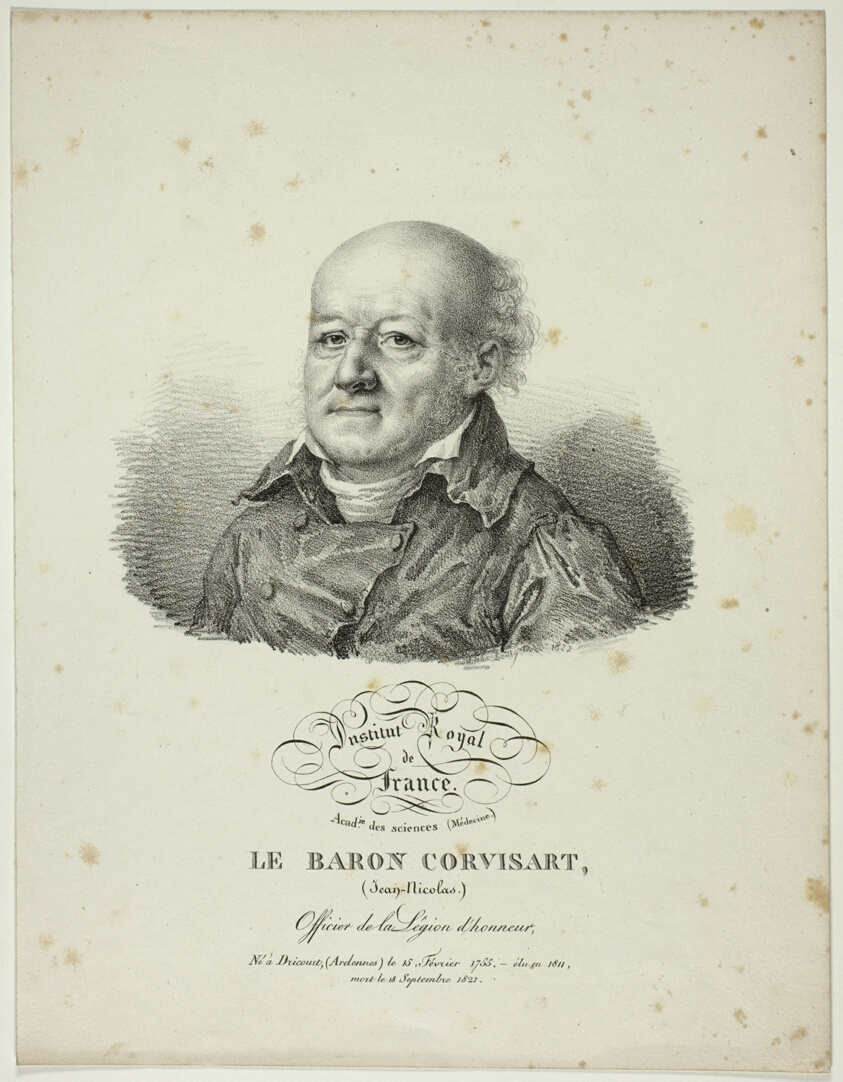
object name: Print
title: Portrait of Jean-Nicolas, Baron Corvisart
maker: Jules Boilly (French, 1786-1874)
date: 1822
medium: Lithograph in black on ivory wove paper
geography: France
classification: lithograph; print; prints and drawing